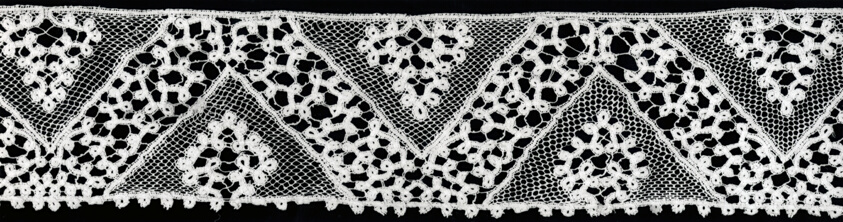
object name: Textile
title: Border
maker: Probably Italy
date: 1750/75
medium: Linen, bobbin part lace; continuous clothwork tapes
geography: Italy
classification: textile; lace - bobbin